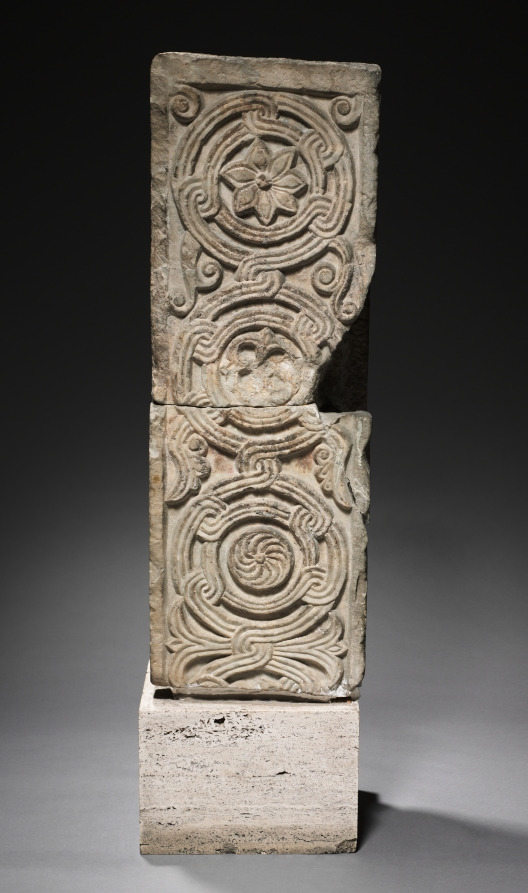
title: Transenna Post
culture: Lombardic, Italy, Rome, Migration period, 8th-9th Century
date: 700s–800s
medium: marble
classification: Sculpture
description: In Christian architecture a transenna is an openwork screen of stone or metal enclosing a shrine. These transenna elements were found in Rome; the posts were said to have been excavated on the Coelian Hill and may have originally formed part of the transenna of the Church of San Saba. The Lombards were an ancient Germanic-speaking tribe that settled in Italy after 568. Their artistic tradition was originally centered on small objects of personal adornment like buckles and brooches. After occupying Italy, the Lombards were in contact with large-scale sculpture of classical and early Christian origin that, by the end of the 700s, they had learned to adopt and imitate, as seen here.